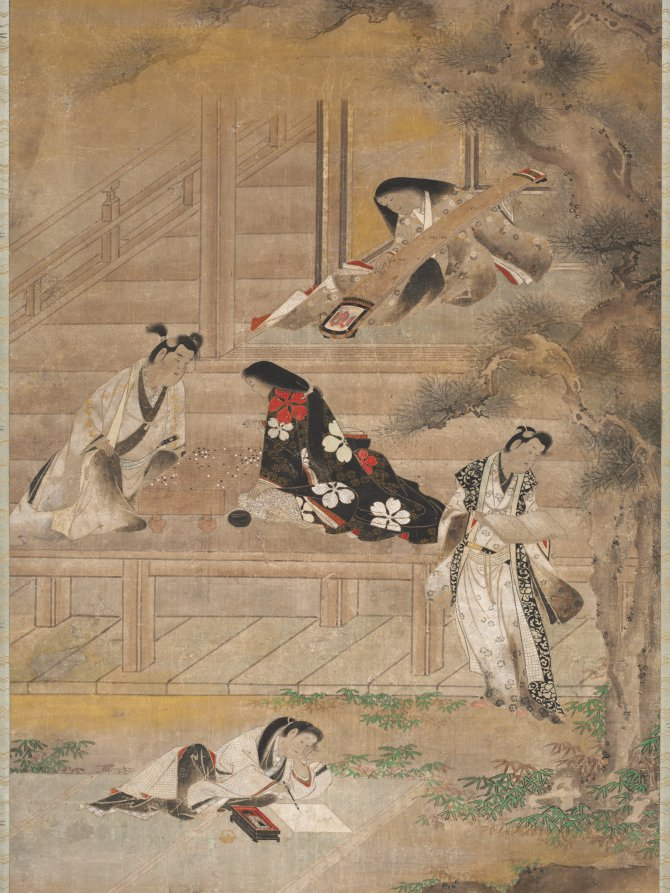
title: The Four Accomplishments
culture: Japan, Edo period (1615–1868)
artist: attributed to Iwasa Matabei (Japanese, 1578–1650)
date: c. 1620–50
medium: Hanging scroll; ink, color, and gold on paper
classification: Painting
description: This painting shows a woman playing a koto, a type of stringed instrument; a pair playing a board game called Go; a man deep in a book; and a boy painting an image of flowers. The group of fashionably dressed figures is set in and around a cozy residence, their poses conveying a sense of carefree pleasure. The scene is a playful response to a theme derived from Chinese culture that presents four notable pastimes of well-educated people.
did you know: The small, golden jar holds water to mix with the youth's ink for his painting.